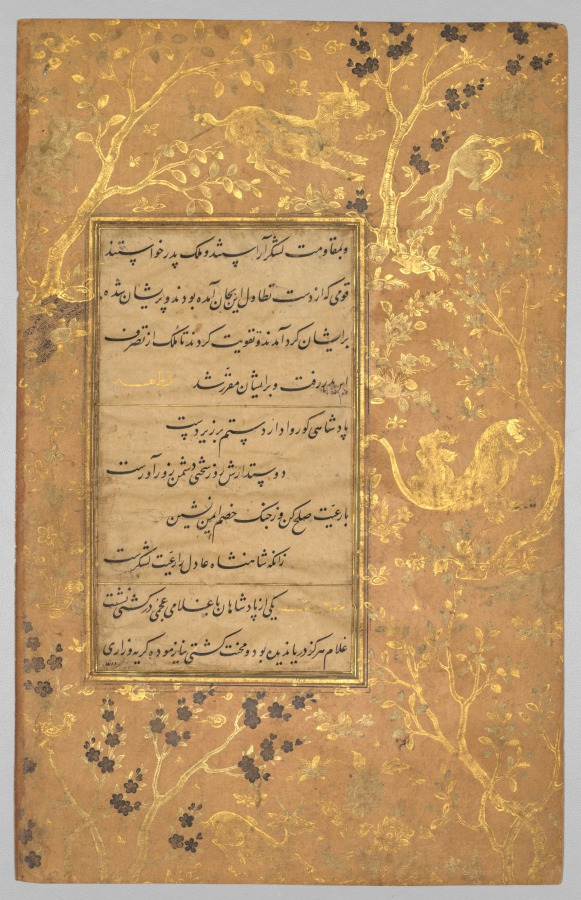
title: Illuminated folio from a Gulistan (Rose Garden) of Sa'di (c. 1213–1291)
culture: Iran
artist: Sultan 'Ali al-Mashadi (Iranian, 1430–1520)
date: about 1475–1500; border: about 1550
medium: Gum tempera, ink, gold, and silver on paper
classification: Manuscript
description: In the border surrounding the Persian poetical text, deer and a lion coexist peacefully in a forest. This imagery may reference the rule of a righteous king. The text is from the Gulistan, one of the most celebrated works of Persian literature, completed around 1258. Gulistan means “Rose Garden” in Persian; just as a rose garden is a collection of flowers, the contents are a collection of anecdotes. This page is from the section “On the Conduct of Kings.”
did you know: The silver blooms and streams of water have tarnished and darkened over time.